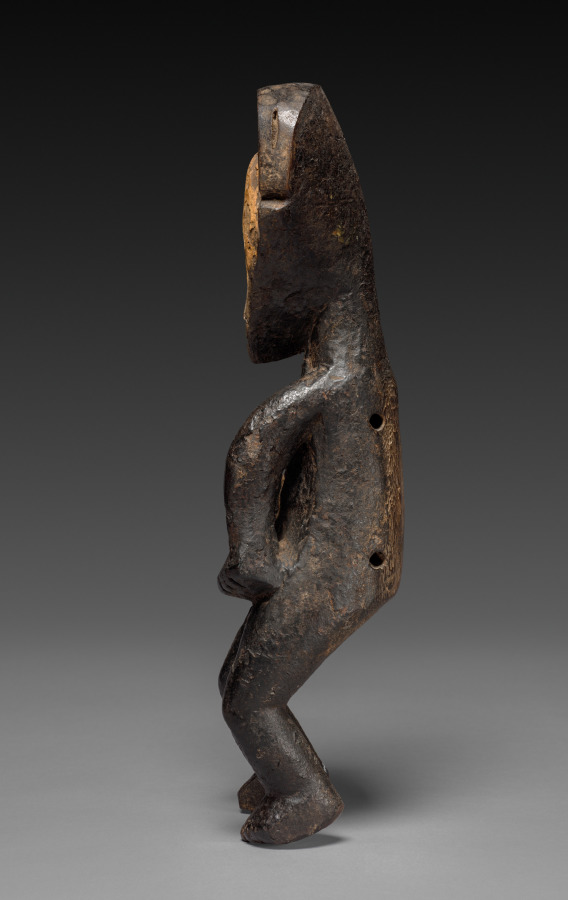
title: Male Figure (Ofika)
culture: Africa, Central Africa, Democratic Republic of Congo, Mbole-style carver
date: late 1800s or early 1900s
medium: Wood, colorant, and upholstery studs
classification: Sculpture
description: Figures such as this, known as ofika, were central to the initiation practices and the enforcement of laws among the all-male Lilwa association, a hierarchical organization that served educational, judicial, political, economic, and ritual functions among the Mbole. Meant to instill a moral code and to act as a cautionary symbol during initiation for Lilwa novices, ofika figures are believed to represent criminals who were ritually hanged for transgressions against Lilwa laws. The figure’s encrusted surface imitates how members covered their bodies with a substance made of ashes and palm oil during burial rites.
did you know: The stripe painted down the figure's torso represents the cord used for execution.